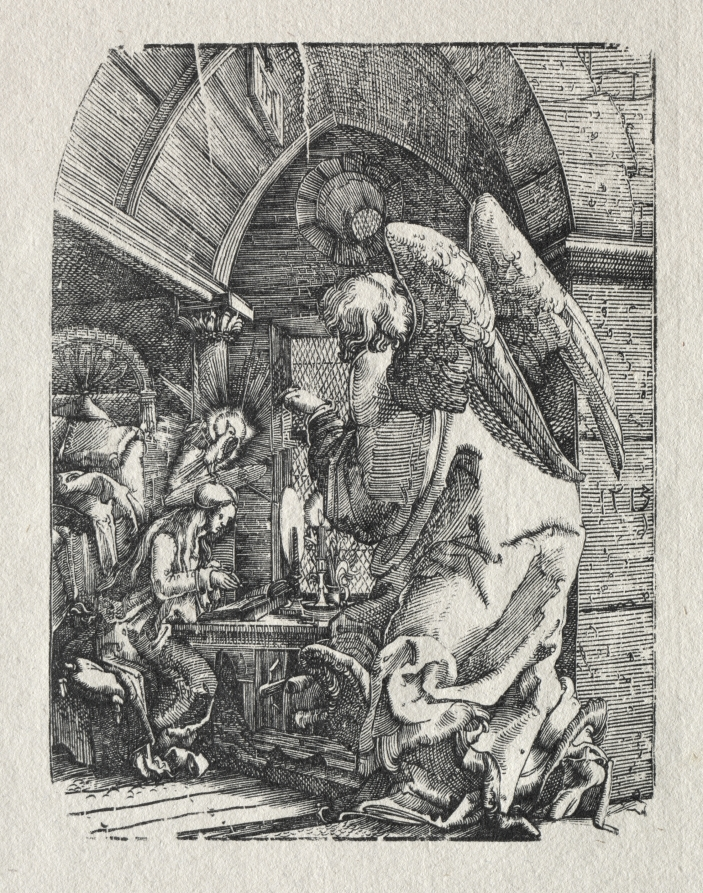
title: The Annunciation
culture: Germany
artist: Albrecht Altdorfer (German, c. 1480–1538)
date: 1513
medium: woodcut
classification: Print